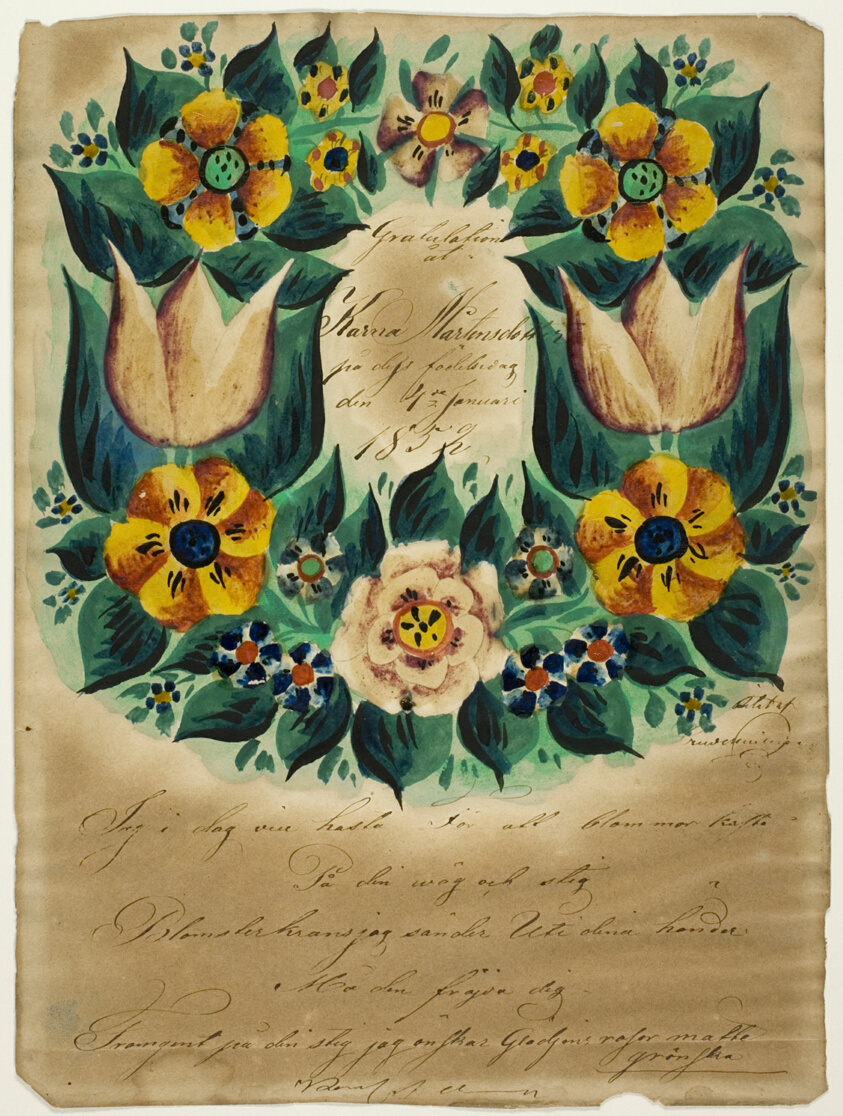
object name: Drawing and Watercolor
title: Letter of Congratulations to Karna Martensdottir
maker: Unknown Artist; Nowegian, 19th century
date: 1852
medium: Watercolor, over graphite, heightened with gum arabic, on cream wove paper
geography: Norway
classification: watercolor; drawings (visual works); prints and drawing